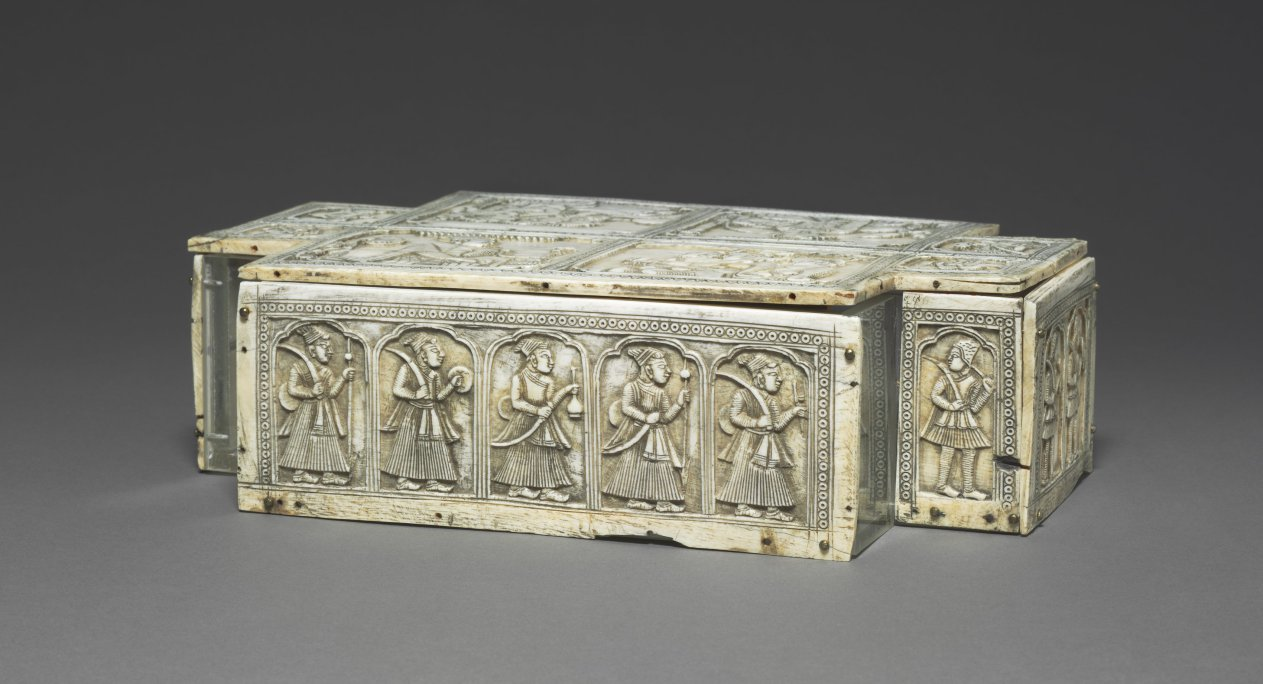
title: Panels from a Box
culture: India, North East Deccan, Visakhapatnam district, Mughal Dynasty (1526-1756)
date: c. 1700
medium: ivory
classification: Ivory